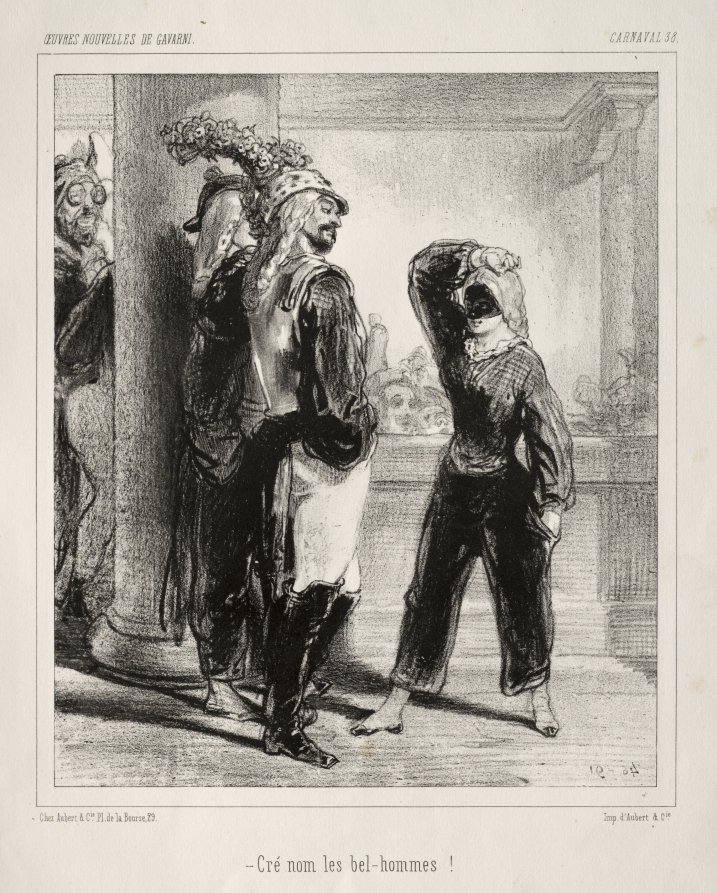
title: Carnaval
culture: France, 19th century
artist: Paul Gavarni (French, 1804–1866)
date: c. 1841–47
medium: lithograph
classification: Print